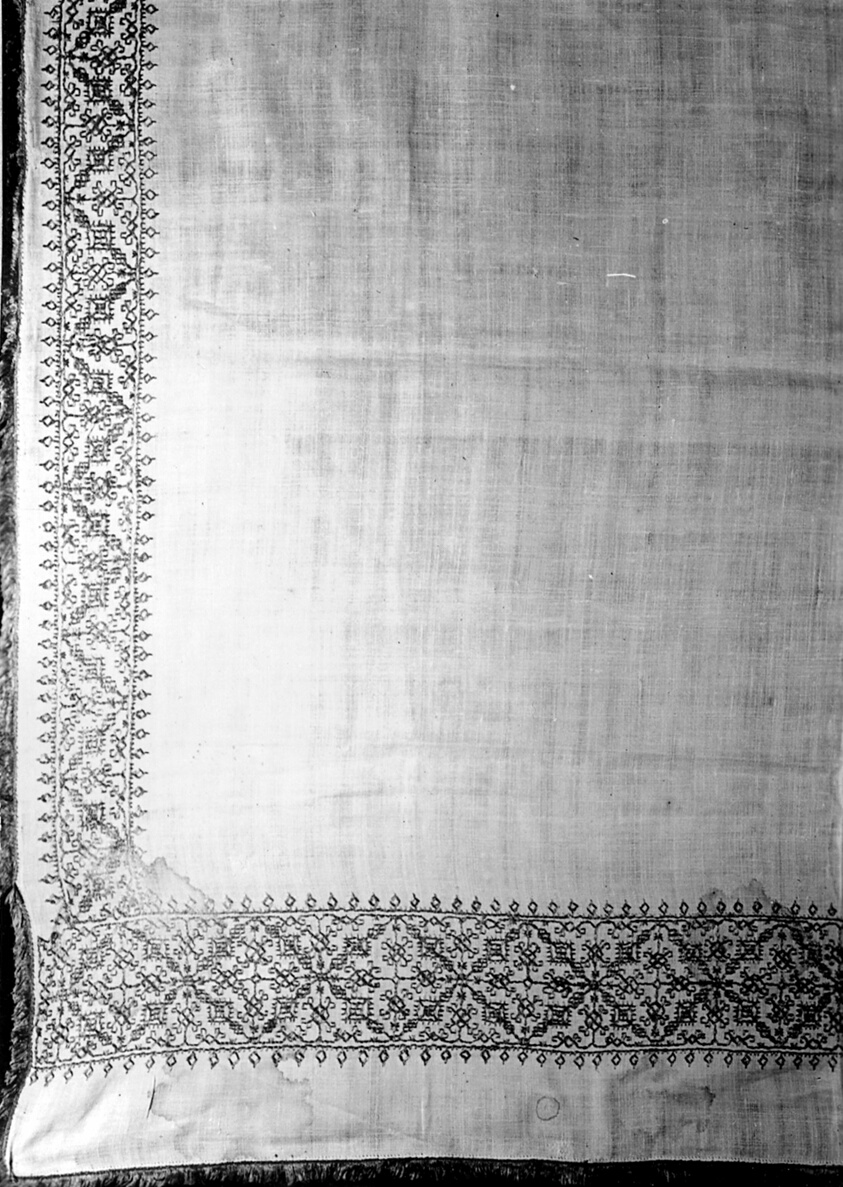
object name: Textile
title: Cover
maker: Italy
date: 17th century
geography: Italy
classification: textile; needlework (visual works)